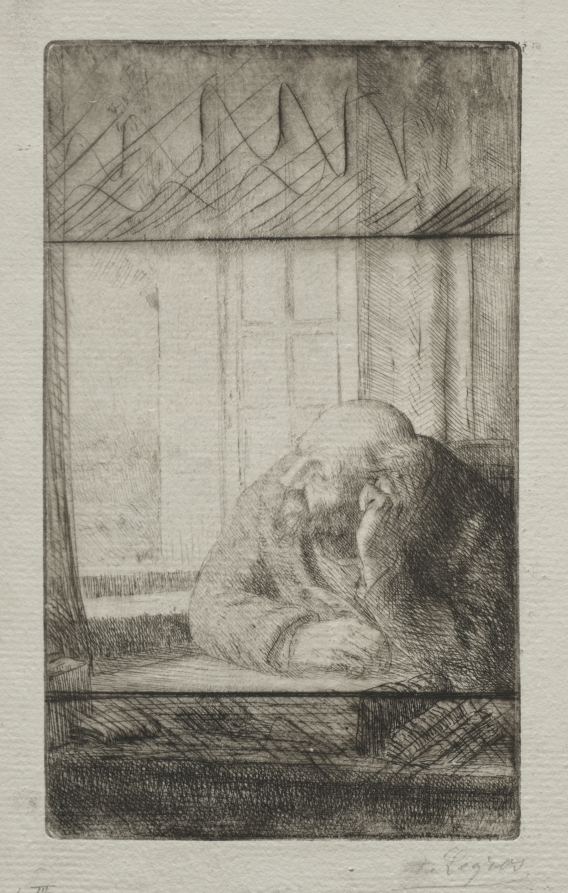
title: Evening at the Window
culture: France, 19th century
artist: Alphonse Legros (French, 1837–1911)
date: 1884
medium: etching and drypoint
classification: Print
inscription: signed, in pencil, at lower right: A. Legros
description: This etching is one of more than 600 that Alphonse Legros created throughout his career. He favored this technique, which allowed artists to sketch on a copper plate as if drawing on paper, for its spontaneity. Legros often worked directly on the plate, crossing off portions to be trimmed away as he went. In this image of a man staring through an open window, Legros scribbled along the upper and lower margins to give the composition a more specific focus.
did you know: Alphonse Legros taught for nearly two decades as a professor of fine arts at the Slade School in London and was the first to add etching to its curriculum.